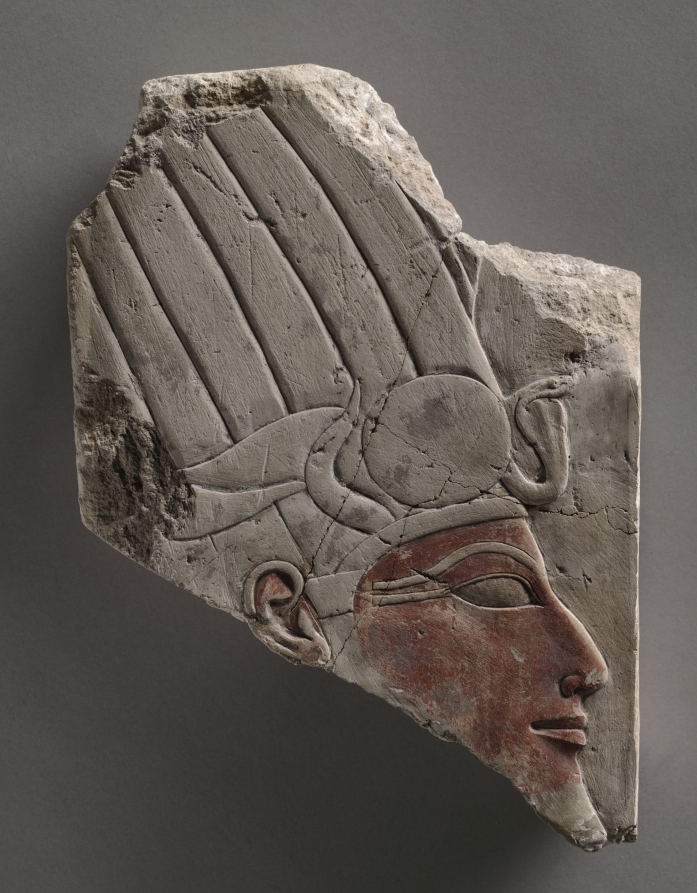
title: Relief of Hatshepsut or Tuthmosis III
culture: Egypt, said to be from Thebes, Deir el-Bahari, Egypt, New Kingdom (1540–1069 BCE), Dynasty 18, reign of Hatshepsut (c. 1479–1458 BCE)–reign of Tuthmosis III (1479–1425 BCE)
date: 1479–1425 BCE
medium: painted limestone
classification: Sculpture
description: At the death of King Tuthmosis II, a child was proclaimed king, Tuthmosis III. His aunt Hatshepsut was named to serve as his regent; however, she quickly proclaimed herself queen and ruled in the boy's stead for over twenty years. To further assert her power she often had herself portrayed in sculpture as a king with masculine torso and even a beard. She is shown here wearing crowns usually reserved for kings. When Tuthmosis III finally ascended to the throne, he had many of her monuments destroyed or vandalized.